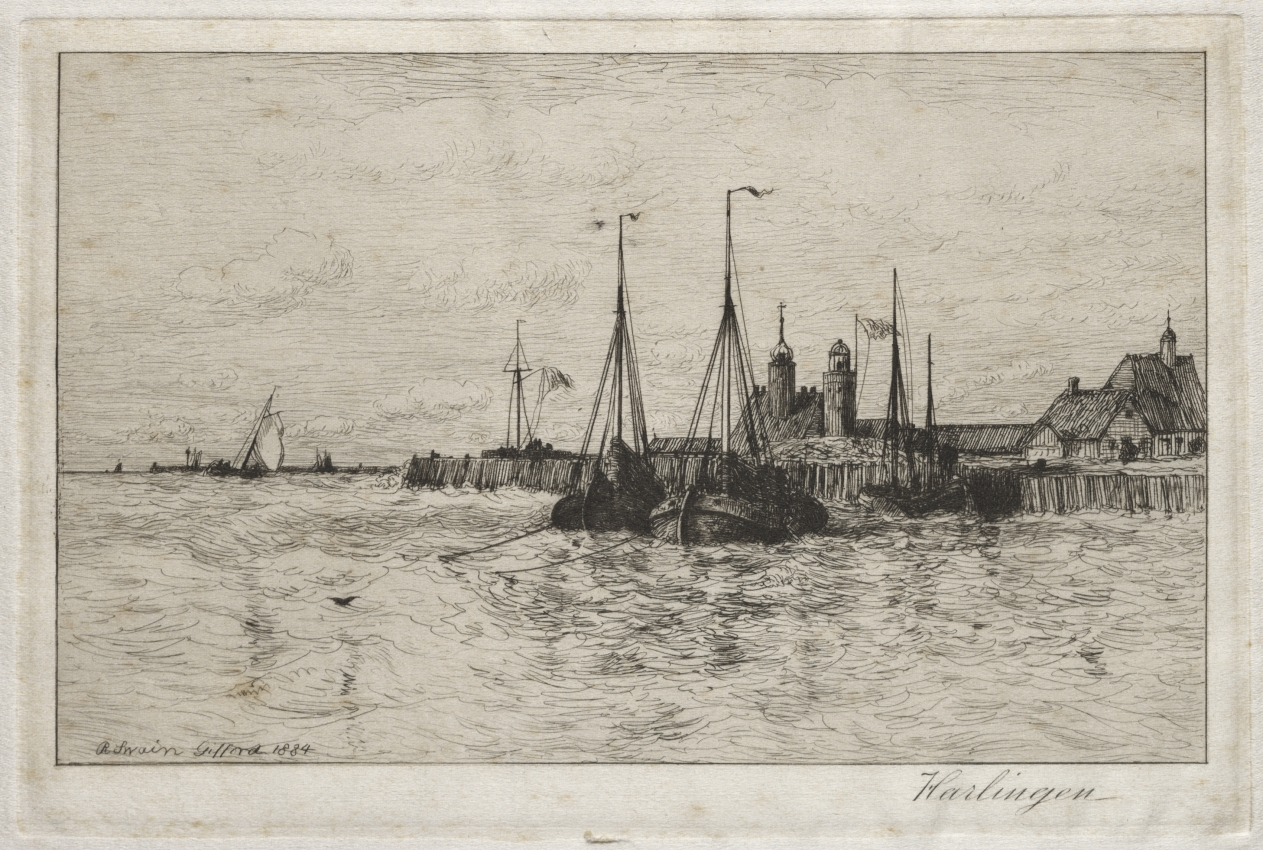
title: Harlingen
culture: America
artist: Robert Swain Gifford (American, 1840–1905)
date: 1884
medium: etching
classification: Print